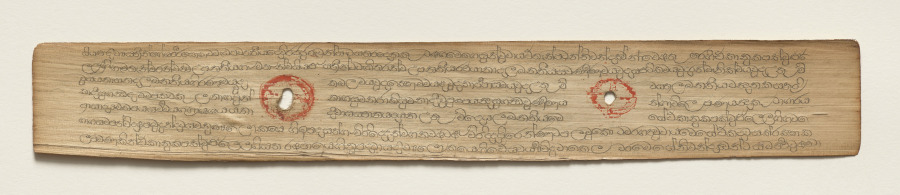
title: Leaf from a Buddhist Manuscript (verso)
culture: Sri Lanka, Singhalese, Late 17th century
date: c. 1700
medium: fiber paper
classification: Manuscript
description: Palm leaf material is still used for manuscripts in Sri Lanka. The palm leaves are prepared first by boiling them, drying them in the sun, and then rubbing them with oils. Scribes then use a metal stylus to incise the text. Then charcoal powder is wiped across the pages, filling in only the inscribed lines.